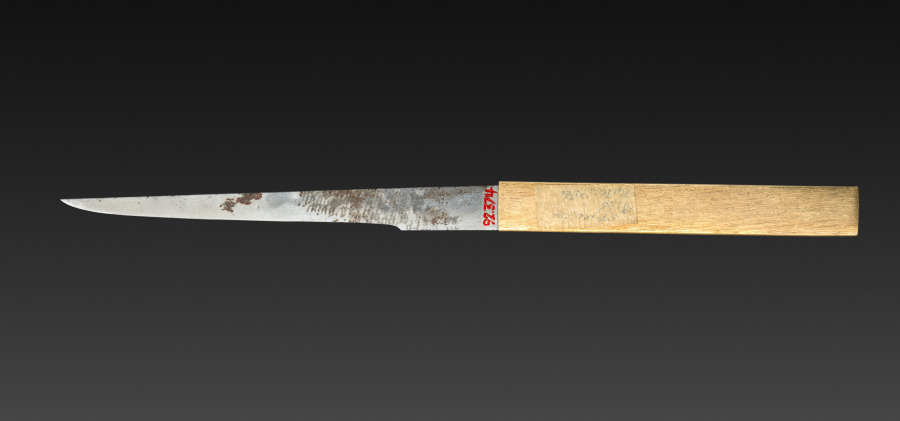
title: Blade with Handle (Kozuka) with Family of Tortoises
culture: Japan, Edo period (1615–1868)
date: 1615–1868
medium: metal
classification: Metalwork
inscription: blade signed: 関金重